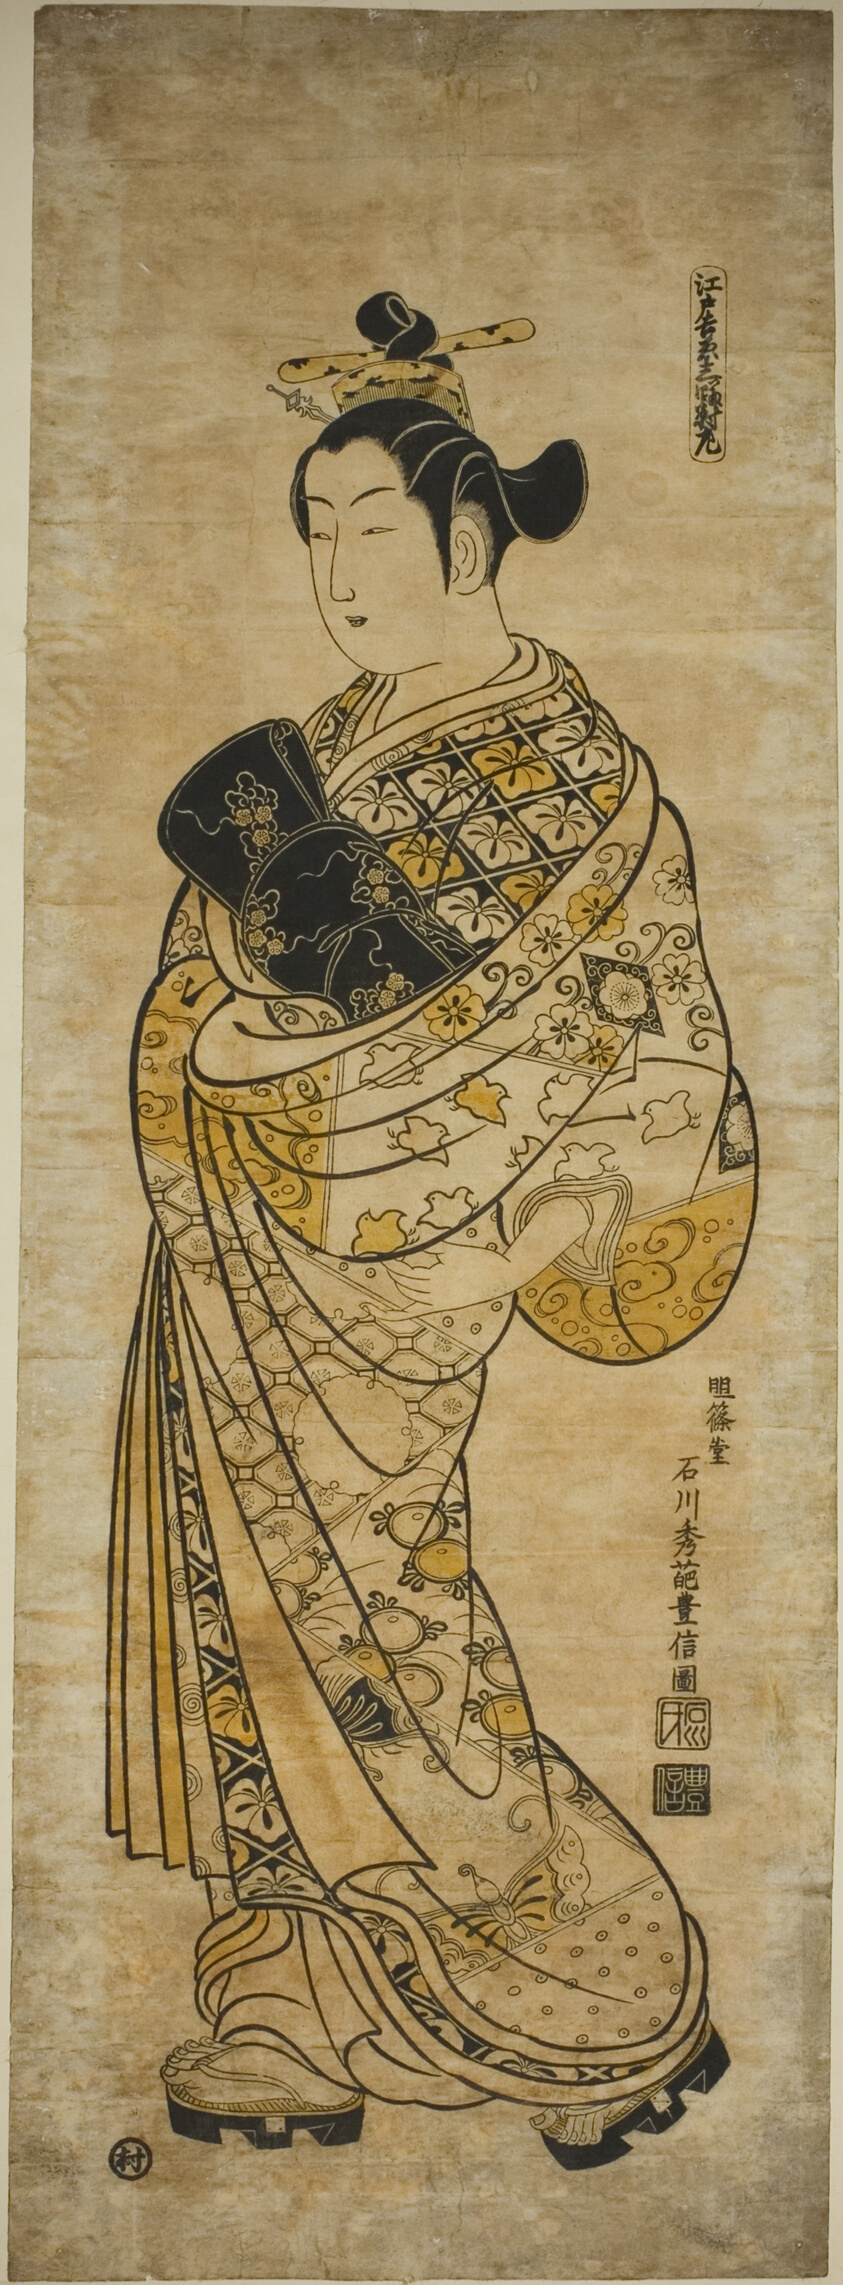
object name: Print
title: The Yoshiwara in Edo - A Set of Three (Edo Yoshiwara sanpukutsui)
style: Japanese (culture or style)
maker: Ishikawa Toyonobu (Japanese, 1711-1785)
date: c. 1736/44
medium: Hand-colored woodblock print; left sheet of toku-oban triptych, beni-e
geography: Japan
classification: woodblock print; print; asian art